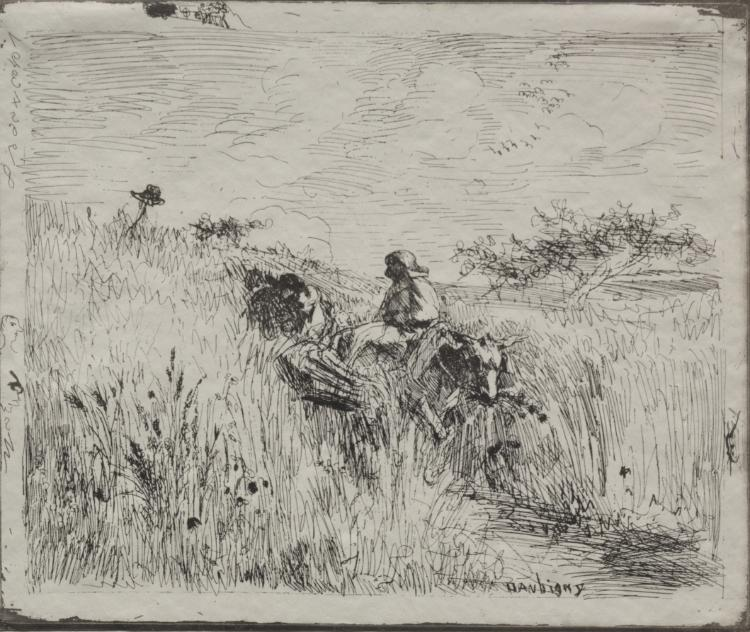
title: Path Through the Grain Field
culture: France, 19th century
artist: Charles François Daubigny (French, 1817–1878)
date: original impression 1862, printed in 1921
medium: cliché-verre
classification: Print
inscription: signed, lower right, in glass plate: Daubigny